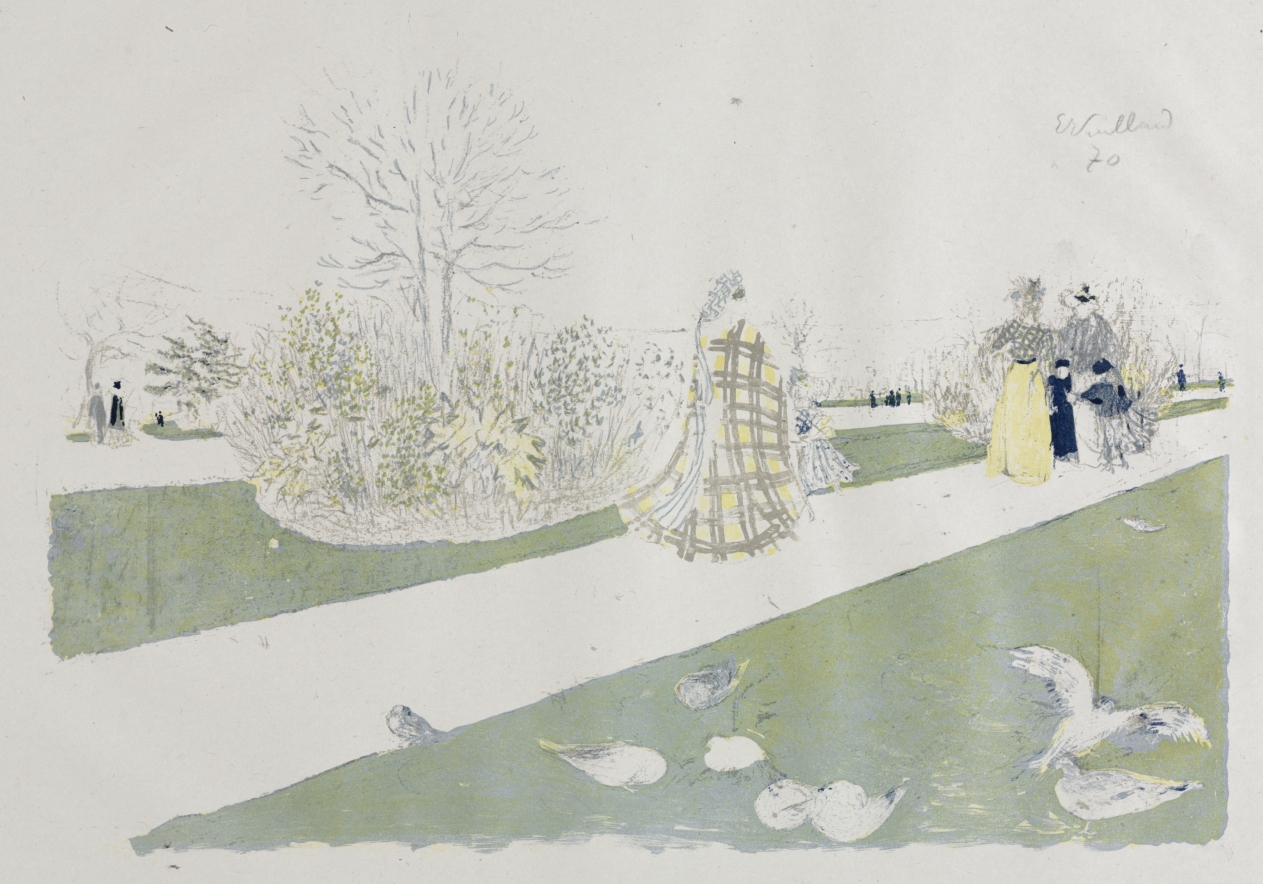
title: The Tuileries Garden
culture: France, 19th-20th century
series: Album des Peintres-Graveurs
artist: Édouard Vuillard (French, 1868–1940)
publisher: Ambroise Vollard (French, 1867–1939)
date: 1896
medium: color lithograph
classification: Print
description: An American guidebook, published in 1928, noted, “Paris loves trees and children. One cannot think for two minutes of either subject without finding the other equally present to mind.” This lithograph portraying adults and children traversing a path in Paris’s most celebrated garden memorializes this association of the city’s parks with children.